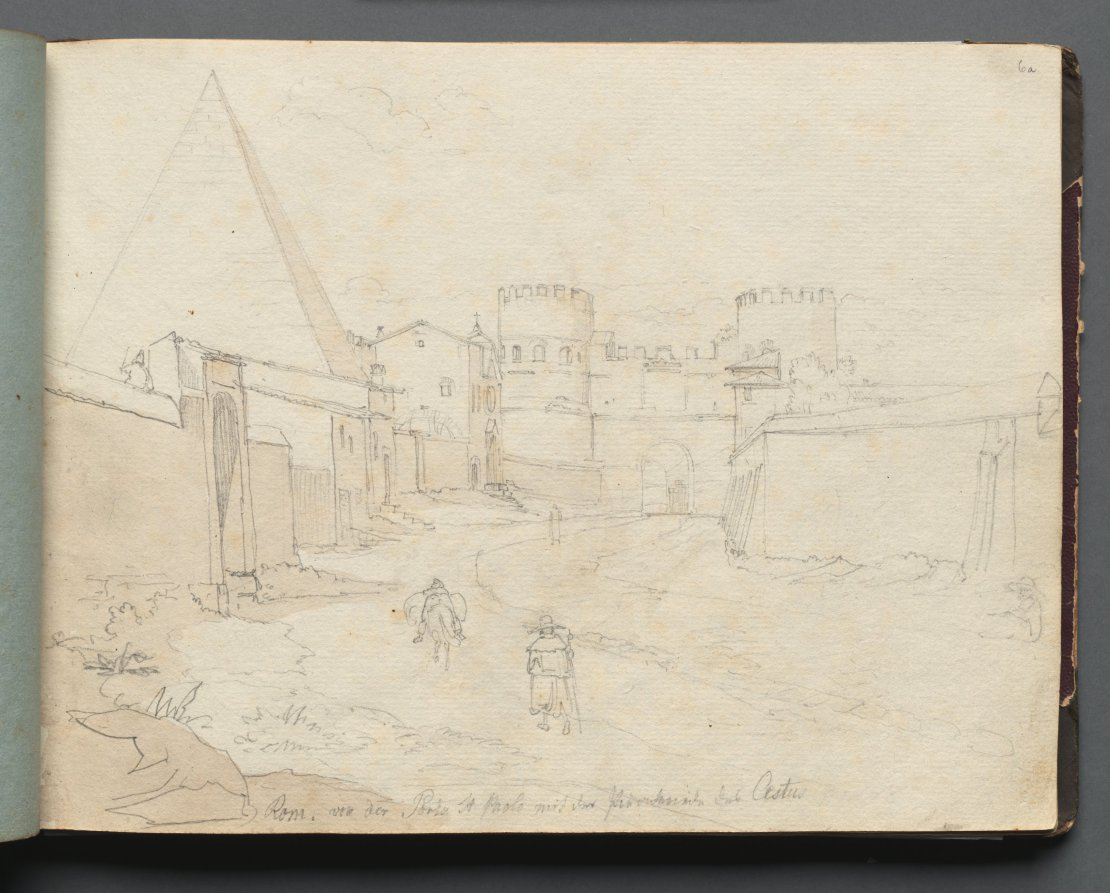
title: Album with Views of Rome and Surroundings, Landscape Studies, page 06a: "Rome von der Porta St. Paolo"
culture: Germany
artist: Franz Johann Heinrich Nadorp (German, 1794–1876)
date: c. 1830s-70s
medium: graphite with brown wash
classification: Bound Volume